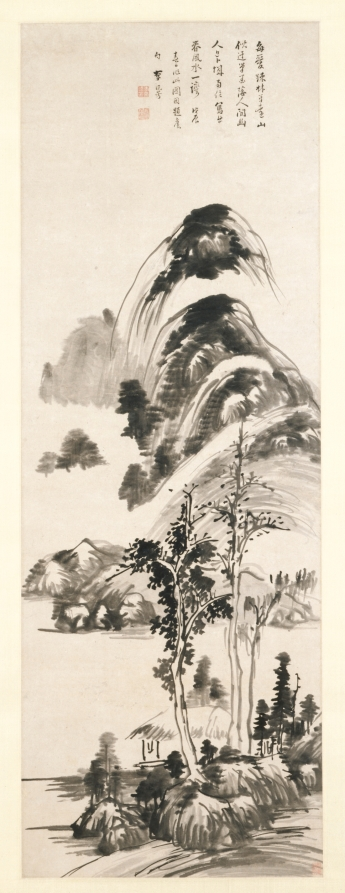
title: Thin Forest and Distant Mountains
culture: China, Ming dynasty (1368–1644)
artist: Li Liufang (Chinese, 1575–1629)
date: 1628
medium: hanging scroll, ink on paper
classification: Painting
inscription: Artist's inscription, signature, and 2 seals: Thin forest and distant mountains have always attracted me; As if they were from the brush and ink of Ni Tsan, left behind by the master in this mortal world. Now that the quiet recluse has chosen to live in the South of the City. He paints the spring breeze---over a curve of the river. In the spring day of the wu-ch'en year [1628] I made this painting and attached an old poem. Li Liu-fang [seals] Li Liu-fang-yin; Chang-heng shih. trans. WKH 1 additional seal of Chung Wen-ming (17th c.).